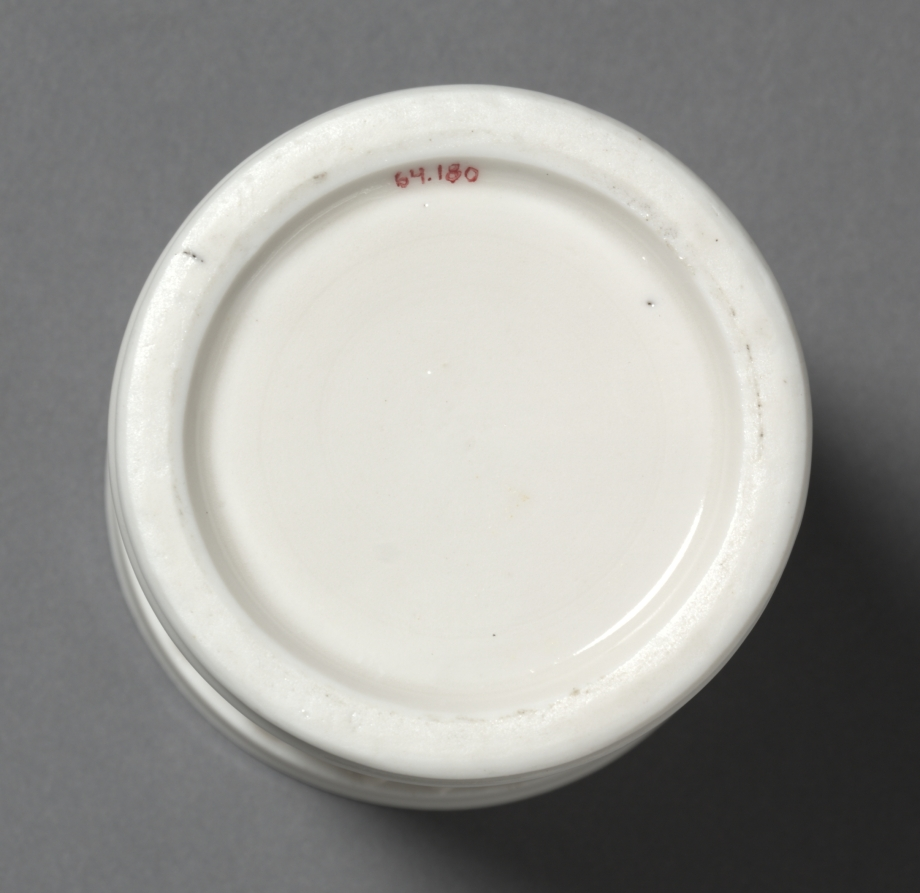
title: Brush Pot with Peonies: Dehua Ware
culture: China, Fujian province, Qing dynasty (1644-1911)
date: 1644–1911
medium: glazed porcelain with pierced and incised decoration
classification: Ceramic